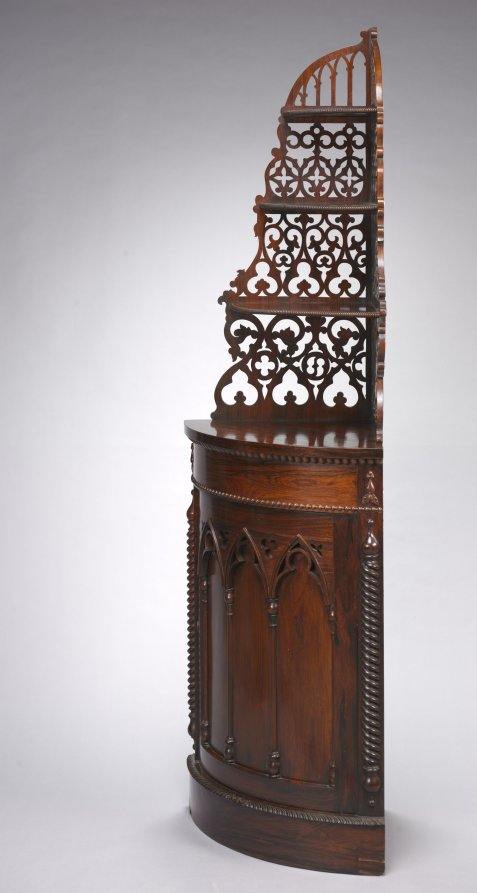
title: Corner Cabinet (Étagère)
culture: America, probably New York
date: c. 1840–50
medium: rosewood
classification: Wood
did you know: This cabinet has elements often seen in a Gothic cathedral, including the dramatic trefoil arches on the bottom.